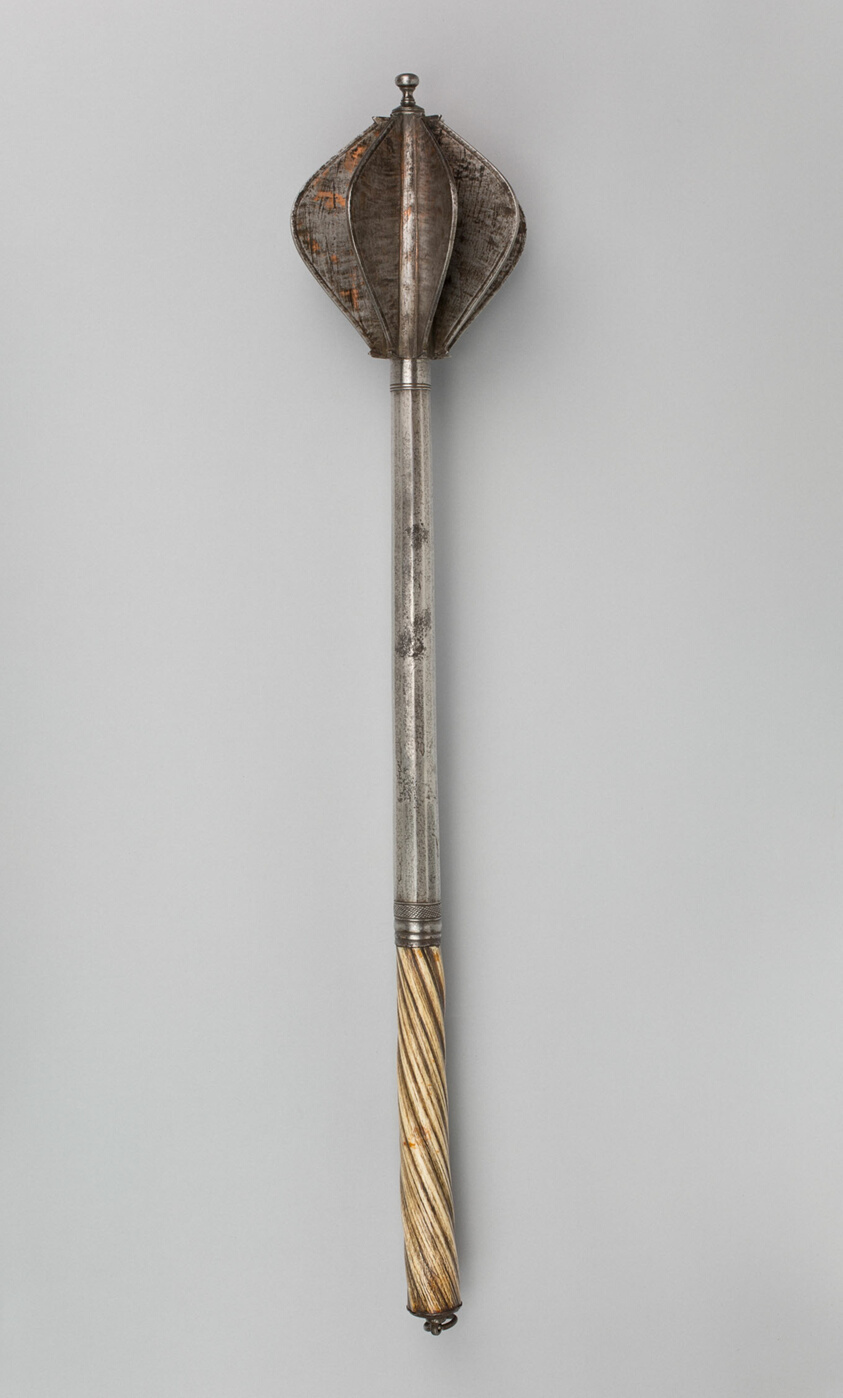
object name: Arms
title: Mace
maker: Eastern European style, probably Polish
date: 1600/1700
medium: Steel, copper-alloy, and narwhal tusk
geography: Poland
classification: shafted weapon; arms; arms and armor